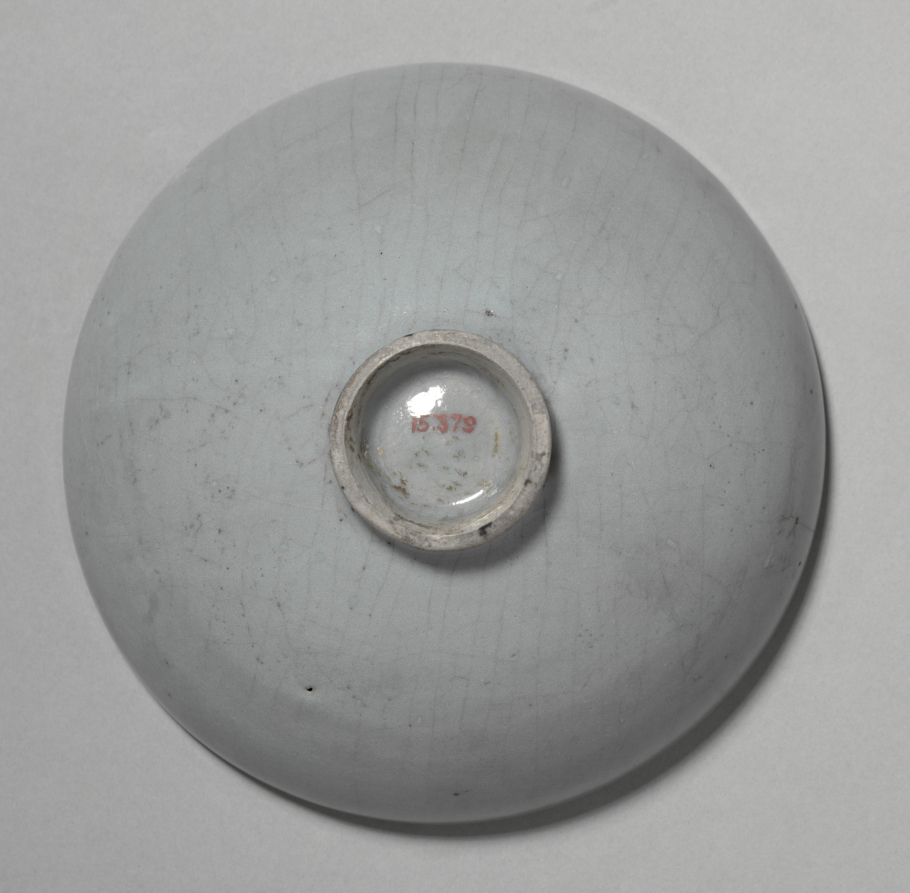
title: Bowl: Jun Ware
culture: Northern China, Northern Song dynasty (960-1127) - Jin dynasty (1115-1234)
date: 1100s-1200s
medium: glazed stoneware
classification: Ceramic